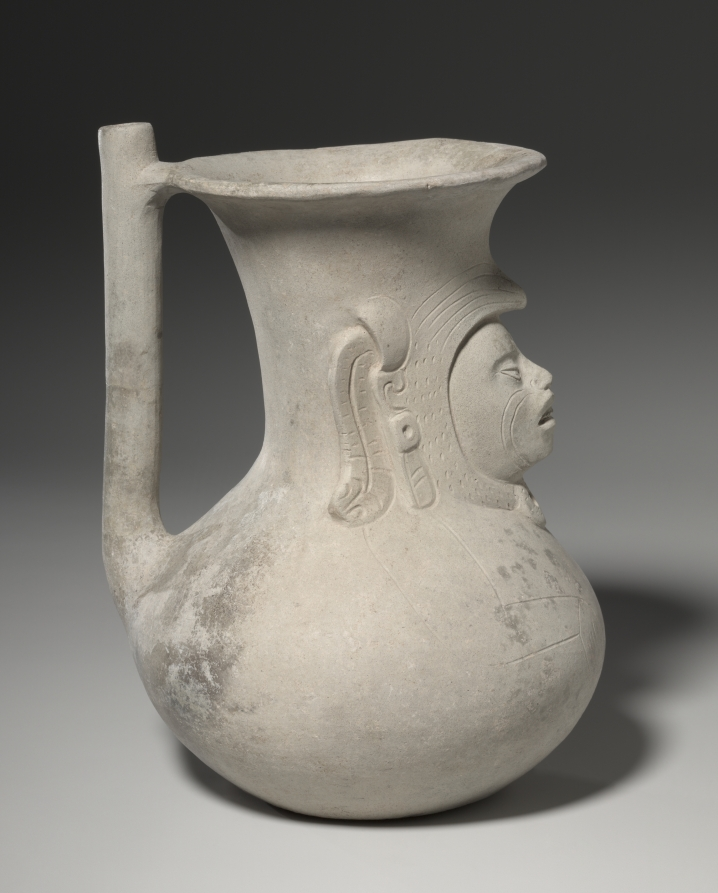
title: Figural Vessel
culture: Mexico, Oaxaca, Zapotec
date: c. 500–150 BCE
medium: earthenware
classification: Sculpture